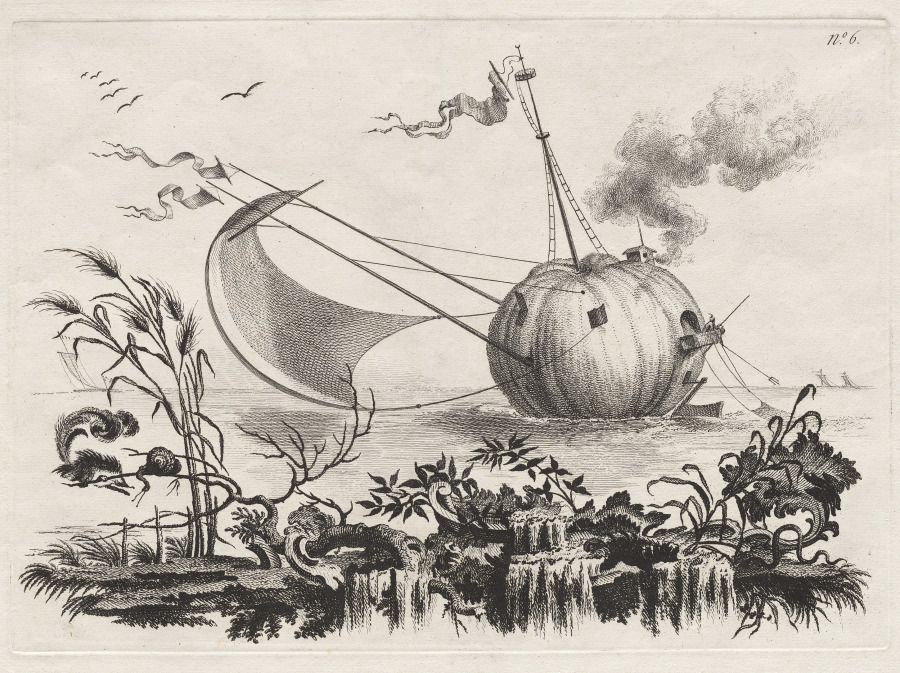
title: A Pumpkin Used as a Fishing Boat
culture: Italy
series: Suite of the Most Notable Things Seen by John Wilkins Erudite English Bishop during His Famous Voyage from the Earth to the Moon … dedicated to Sir William Hamilton ambassador to the Court of Naples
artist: Filippo Morghen (Italian, 1730–after 1807)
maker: possibly after Jean-Pierre-Louis-Laurent Hoüel (French, 1735–1813)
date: about 1769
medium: etching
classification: Print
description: Filippo Morghen’s set of 10 etchings is outstanding among visual narratives of imaginary voyages to the moon, both visual and literary, that intrigued 18th-century European audiences. A title page and nine plates depict the imagined lives and economy of moon dwellers. These include modes of transport such as large birds and sailboats propelled by giant bellows, enormous scissors for capturing wild beasts (including an oversized rat), and the use of giant pumpkins as fishing boats and as dwellings. Representations of the moon dwellers are based on inaccurate and imaginary European interpretations of Asian, Ottoman, and Native American cultures—called chinoiserie and turquerie—that permeated the decorative and visual arts of the period.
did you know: Morghen based this print series on three books dedicated to moon exploration, including Bishop Francis Godwin’s, Man in the Moone, 1640.